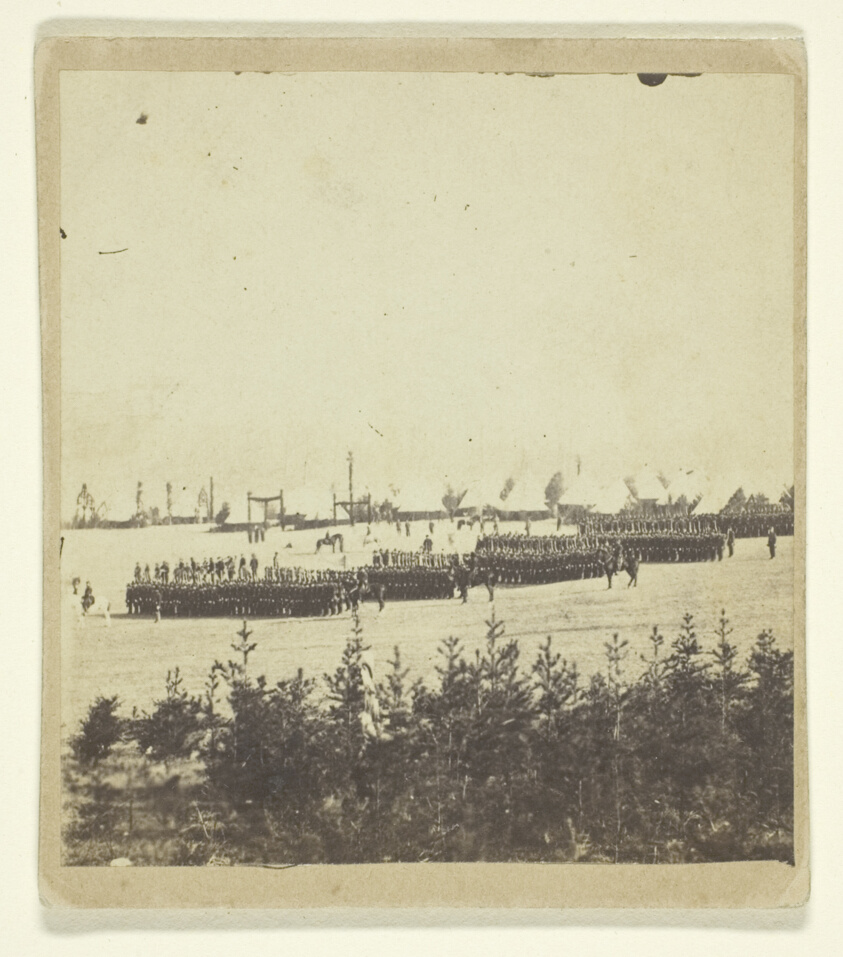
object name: Photograph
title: A Dress Parade of the Seventeenth New York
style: 19th century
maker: Artist unknown; American, active 19th century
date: 1861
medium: Albumen print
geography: United States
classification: photographic process; photography; photograph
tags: Collected by Hugh Edwards